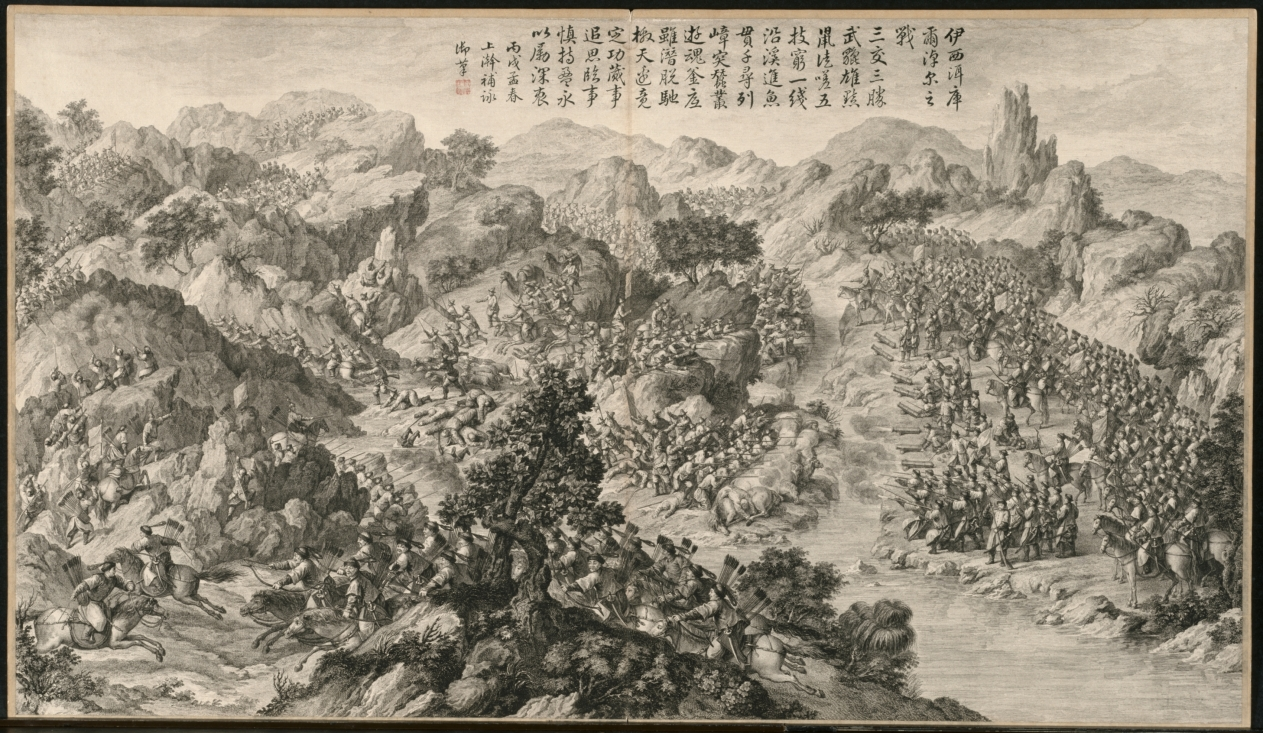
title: Battle at Yixi'er Ku'ernao'er: from Battle Scenes of the Quelling of Rebellions in the Western Regions, with Imperial Poems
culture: China, Qing dynasty (1644–1911), Qianlong reign (1736–95)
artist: Jean Damascene Sallusti (Italian, d. 1781)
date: c. 1765–74; poem dated 1766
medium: etching, mounted in album form, 16 leaves plus two additional leaves of inscriptions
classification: Print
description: This set of etchings was commissioned by Emperor Qianlong to record in pictorial terms the courage of his generals and soldiers in quelling the rebellions in the Western Regions. Qianlong added his own poem to each of the etchings, indicating his appreciation and pride in this demonstration of military might. "Western Regions" refers to the present-day Xingjiang province, often described in Western writing as "Central Asia."